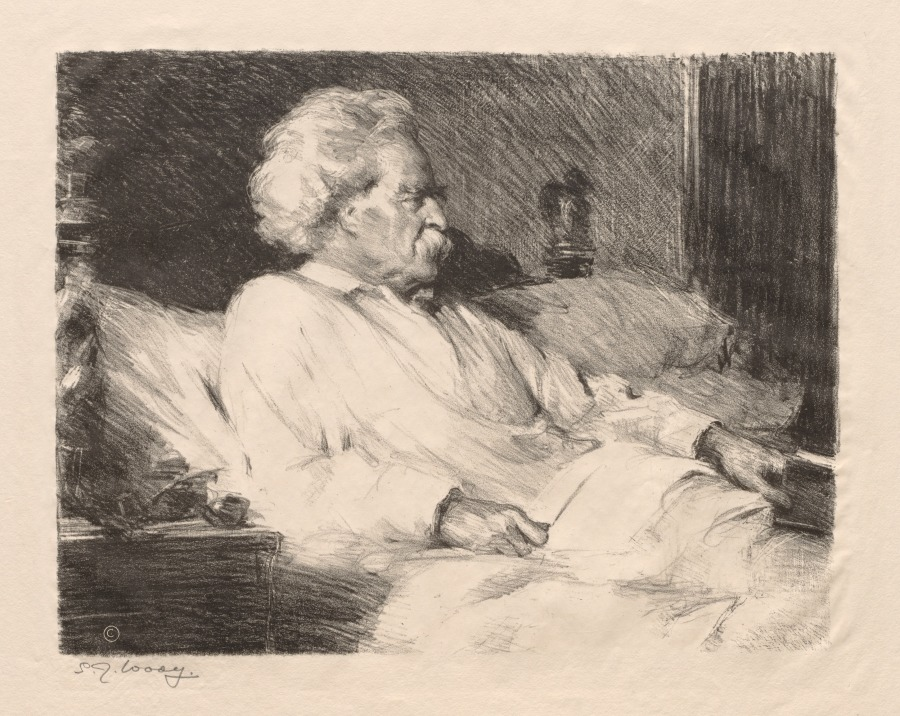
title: Mark Twain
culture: America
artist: Samuel Johnson Woolf (American, 1880–1948)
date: c. 1919–20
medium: lithograph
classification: Print